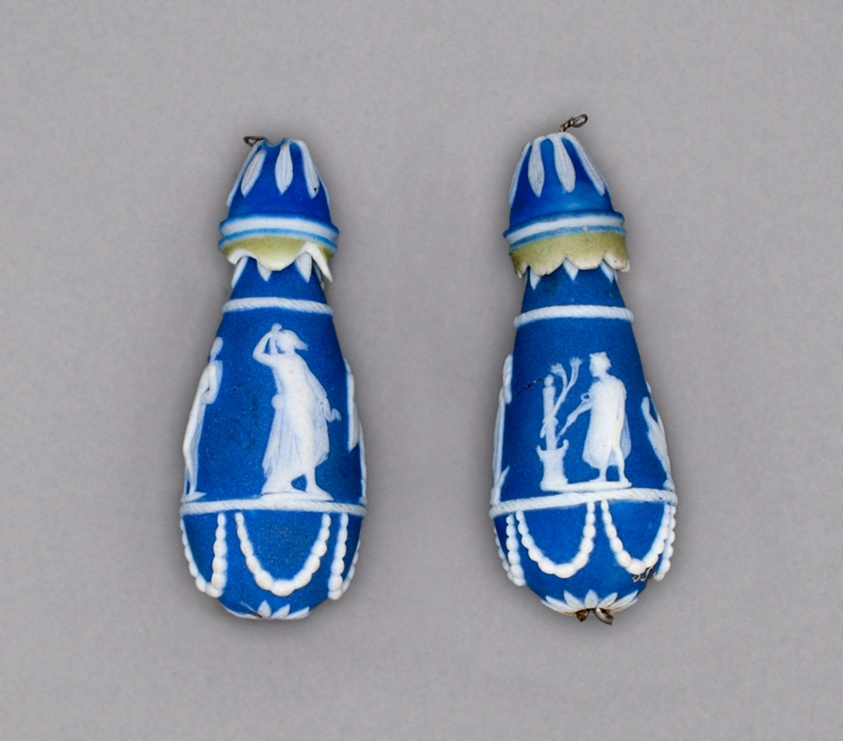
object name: Ceramics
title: Ear Drops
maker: Wedgwood Manufactory (England, founded 1759)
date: Late 18th century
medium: Stoneware (jasperware)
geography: Burslem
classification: accessories (object genre); stoneware; european decorative arts; ceramics